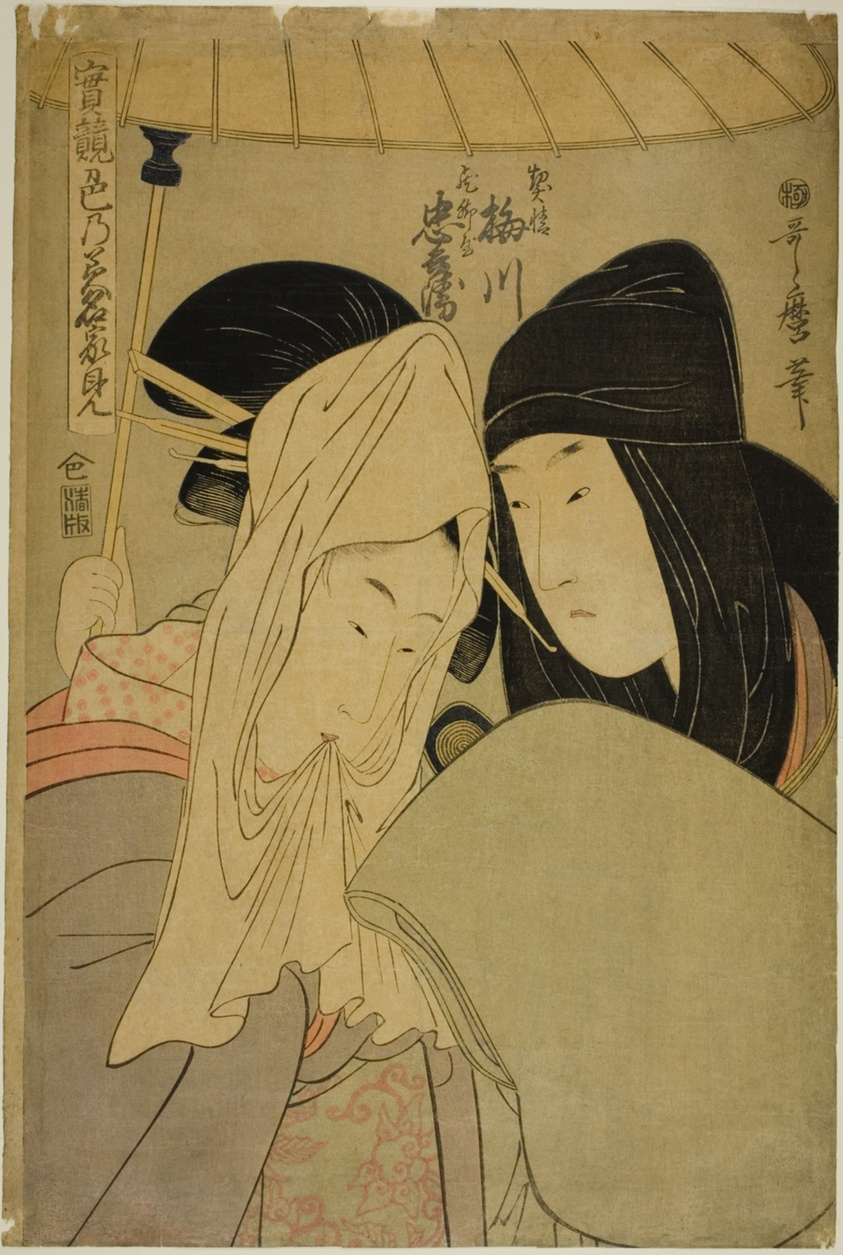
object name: Print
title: The Courtesan Umegawa and Chubei of the Courier Firm (Keisei Unegawa, Hikyakuya Chubei), from the series "True Feelings Compared: The Founts of Love (Jitsu kurabe iro no minakami)"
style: Japanese (culture or style)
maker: Kitagawa Utamaro 喜多川 歌麿; Japanese, 1753 (?)-1806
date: c. 1798/99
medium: Color woodblock print; oban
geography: Japan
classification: woodblock print; print; asian art